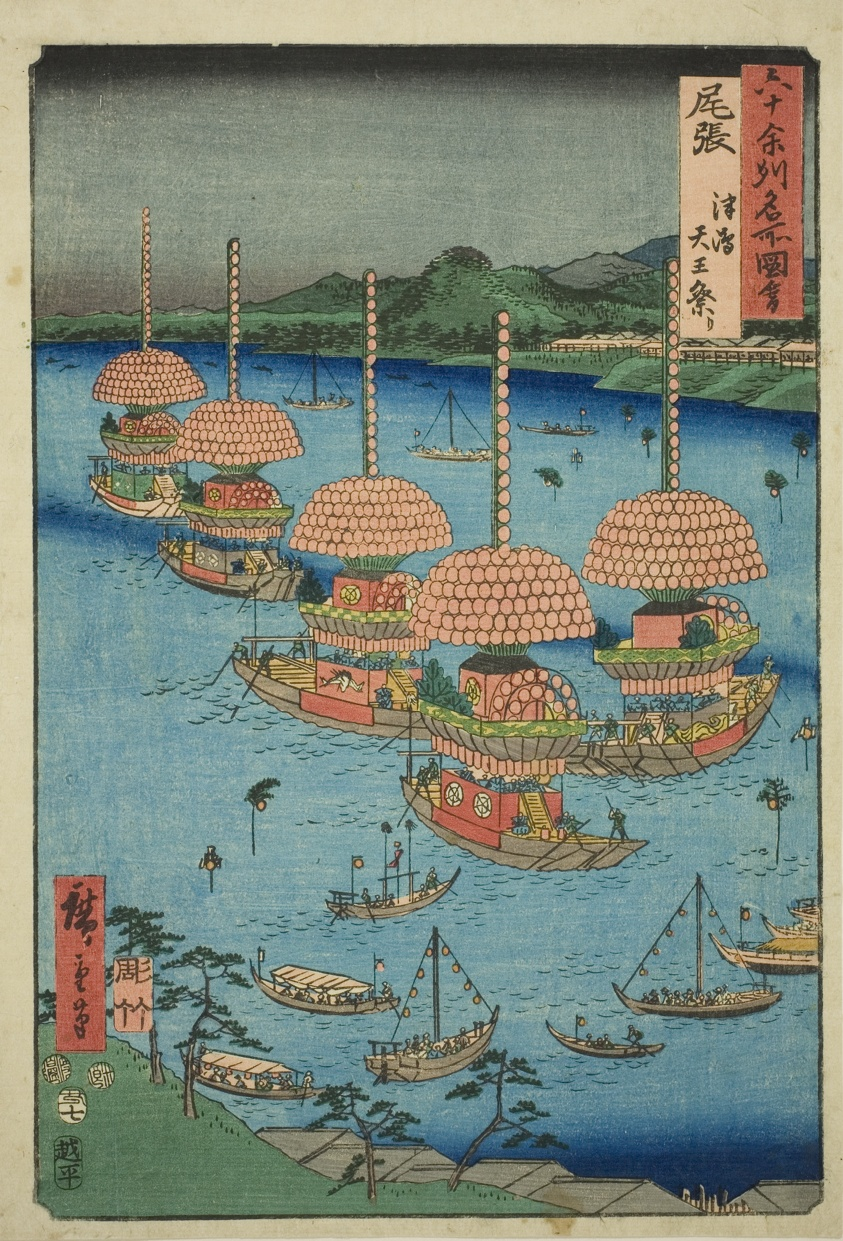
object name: Print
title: Owari Province: Tenno Festival at Tsushima (Owari, Tsushima Tenno matsuri), from the series "Famous Places in the Sixty-odd Provinces (Rokujuyoshu meisho zue)"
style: Japanese (culture or style)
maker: Utagawa Hiroshige 歌川 広重; Japanese, 1797-1858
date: 1853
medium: Color woodblock print; oban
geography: Japan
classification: woodblock print; print; asian art